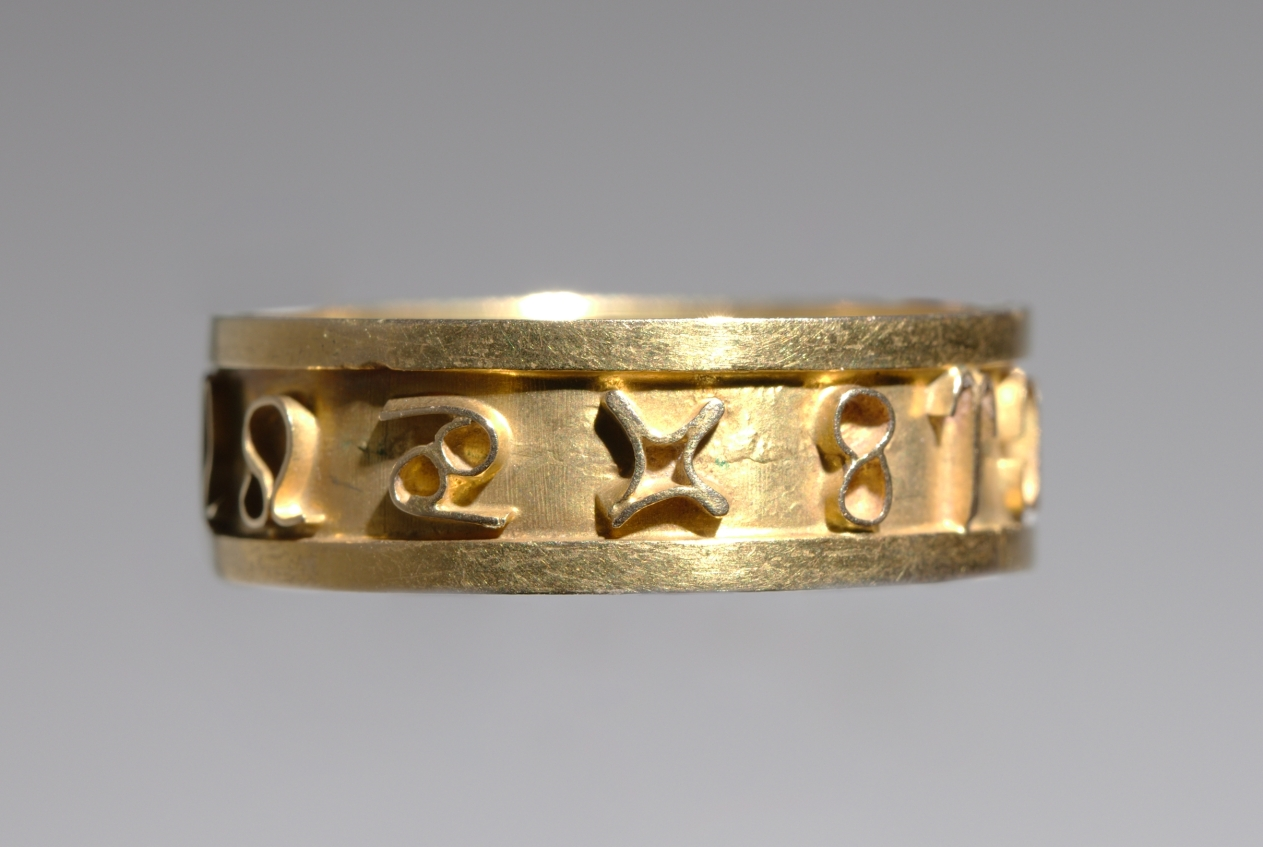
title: Ring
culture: Africa, North Africa, unknown maker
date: 1700s–1800s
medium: Gold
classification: Jewelry